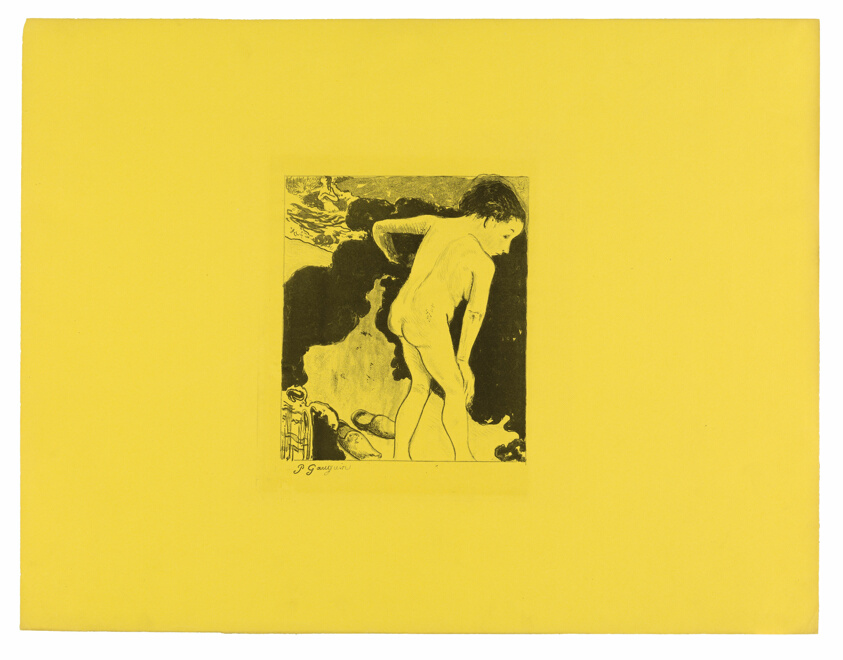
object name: Print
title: Breton Bathers, from the Volpini Suite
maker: Paul Gauguin (French, 1848-1903)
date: 1889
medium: Zincograph in black on chrome yellow wove paper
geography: France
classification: zincograph; lithograph; print; prints and drawing